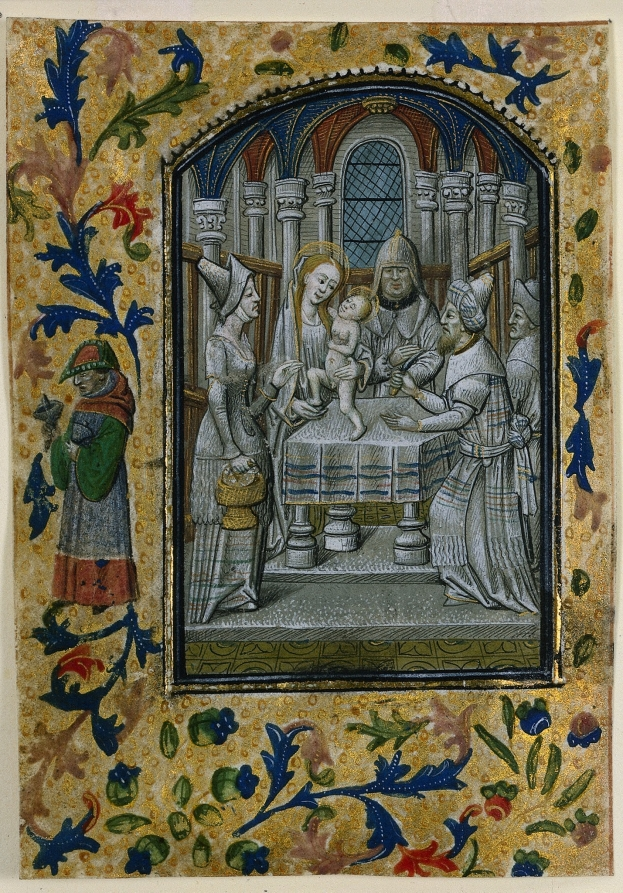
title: Leaf from a Book of Hours: Presentation in the Temple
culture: Flanders, Bruges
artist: Guillaume Vrelant (Flemish, c. 1454–1481)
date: c. 1470–1480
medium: tempera, liquid gold, and grisaille on vellum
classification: Manuscript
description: Guillaume Vrelant, born in Utrecht, was known to be in Bruges from 1454 onward where he died around 1481. He probably went there to sidestep a 1427 law which banned the sale of Utrecht images. A painter very much in vogue, he founded the Illuminators’ Guild in Bruges under the patronage of Saint John the Evangelist. He is known to have provided manuscripts to the Burgundian court.